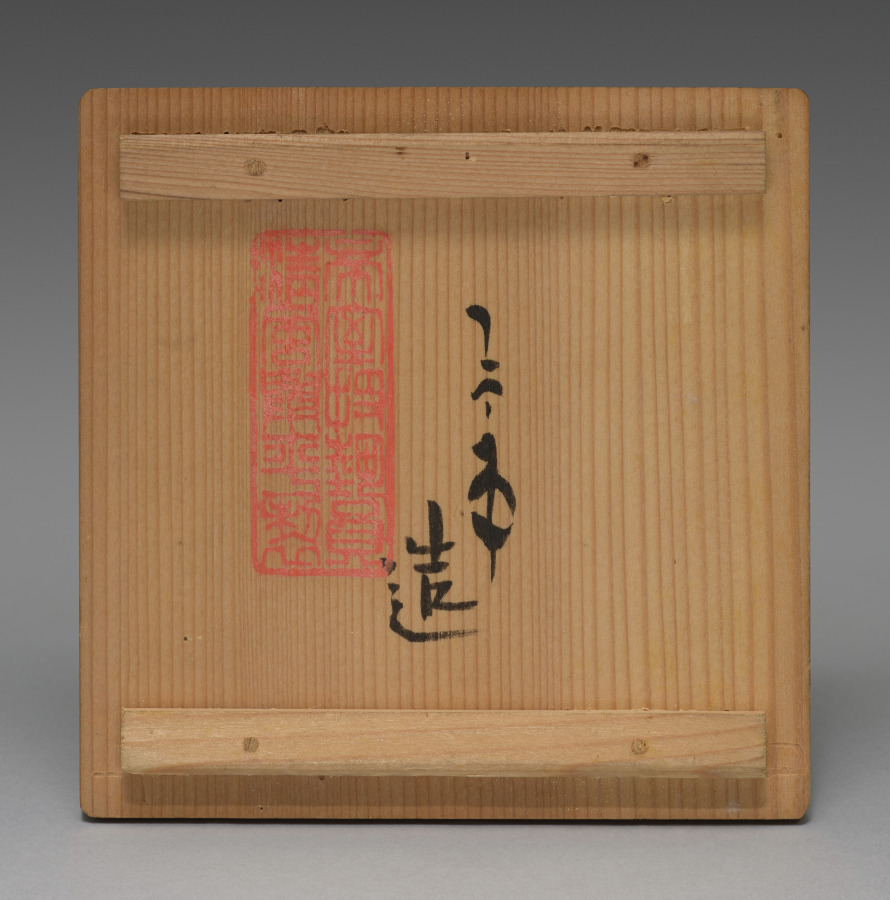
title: Tea Set with Orchids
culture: Japan, Meiji period (1868–1912)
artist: Seifū Yohei III (Japanese, 1851–1914)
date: c. 1893–1914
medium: Teapot with set of five teacups; porcelain with underglaze blue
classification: Ceramic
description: Although the teapot here is stored in a separate box from the five cups, these six pieces may once have been part of a tea set that included other tools such as a water cooler. The teacups have orchid flowers on both sides in underglaze blue, as well as a blue band inside the footring. The teapot has the same design and a blue band painted around the bottom of the lid’s knob. The cups’ long wood storage box is stamped on the exterior, over the lid and base, with a small red seal reading “Satō.” The same seal appears on five small squares of yellow textile, one placed in the bottom of each compartment in the teacup storage box. These are additional to the customary yellow cloths stamped with a “Seifu” seal. Interestingly, four of the Seifū cloths are stamped with an ovoid seal, while the remaining cloth, which is a slightly lighter color, has an unusual seal that is not quite gourd-shaped and with the fū of Seifū in a stylized, unrecognizable form. The teapot has its own box with a Satō seal and is wrapped with an orange textile stamped with the same unusual Seifū seal. A set with a very similar surface design is in the Brooklyn Museum. The Brooklyn set has a water cooler and a small pitcher, in addition to the teapot and cups, and all are in a single storage box. This box records the tea tools as made with kanpakuji, or “bright-jewel white porcelain,” counted among Yohei III’s most important inventions, and carved images. In fact, both sets have a white surface much closer in coloration to the cool white of porcelain clay used in Kyoto at the time, and the designs are simply painted. The Brooklyn set was thus likely mismatched at some point with a box intended for another tea set. Nonetheless, the box may have helped prevent the set’s original components from being dispersed, and the set itself provides insight into how the other tools from the present set may have looked.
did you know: This tea set with orchids has a side-handled pot called a kyūsu, used for steeping, straining, and serving tea.